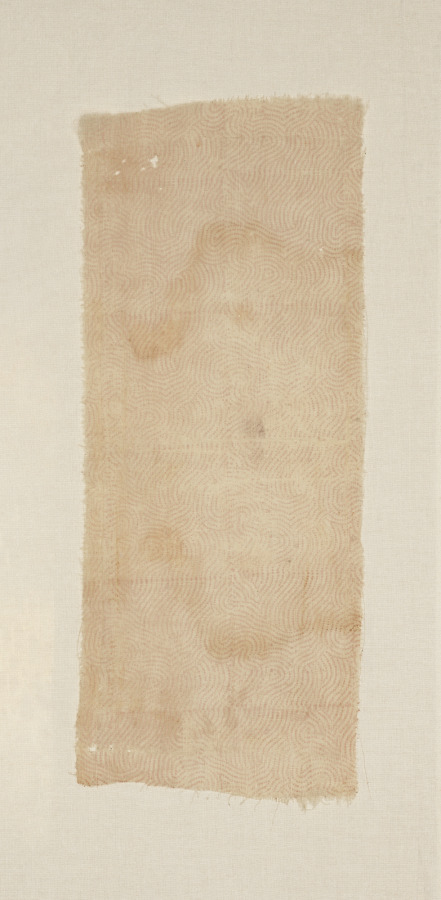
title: Fragment of Draped Apparel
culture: India, Rajasthan or Northern Deccan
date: 1700s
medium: Block printed with gold leaf (varak) on undyed plain weave cotton muslin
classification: Textile